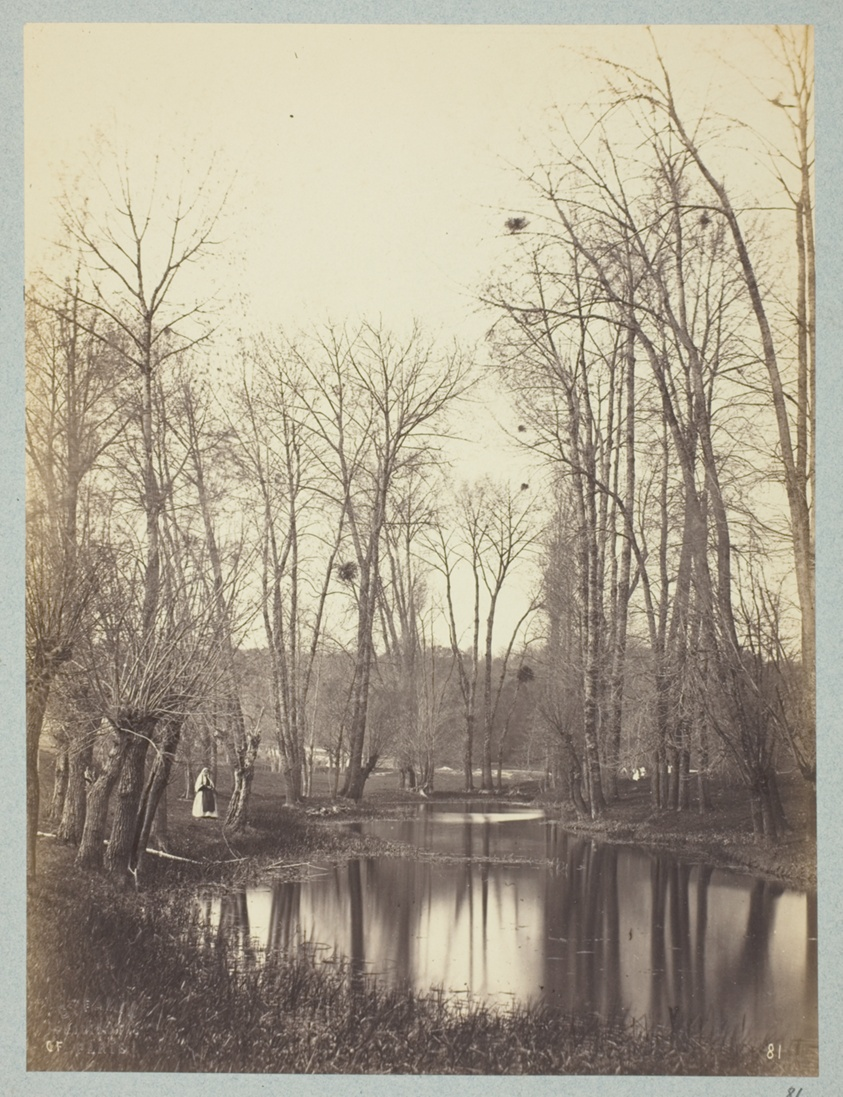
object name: Photograph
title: Etang et Fermiere (Pool and Farmer's Wife)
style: 19th century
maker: Constant Famin (French, active 1863–1874)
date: c. 1865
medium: Albumen print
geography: France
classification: albumen silver print; photographic process; photography; photograph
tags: landscapes, photography